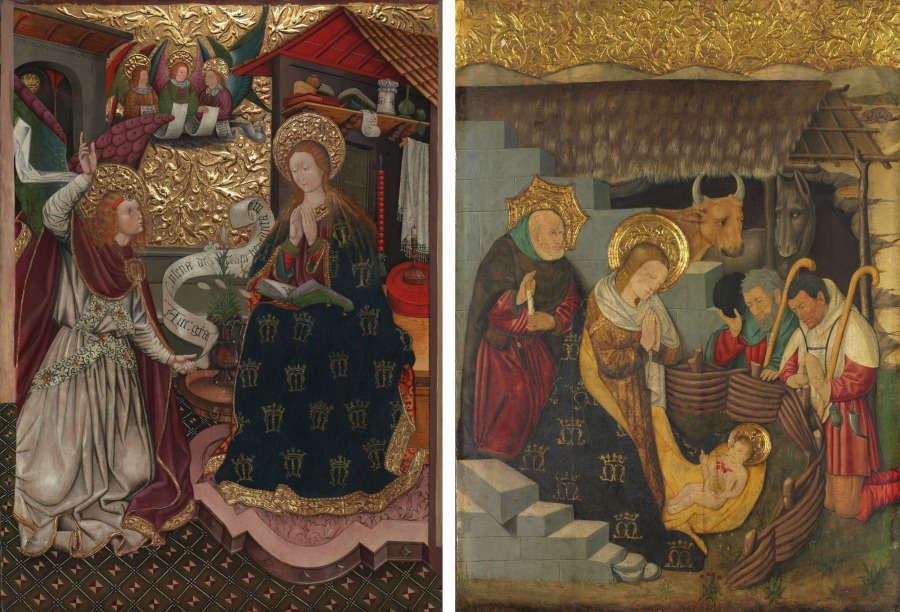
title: The Annunciation and The Nativity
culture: Spain, Catalonia, 15th century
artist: Jaume Ferrer the Younger (Spanish, Catalonia died c. 1460/70)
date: c. 1457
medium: oil, tempera, and gold on wood panel (fir)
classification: Painting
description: These paintings are believed to be the remaining components of a six-panel altarpiece. The large central panel is now preserved in Barcelona (Museu National d’Art de Catalunya). Ferrer collaborated with the painter Pere Garcia de Benavarri on this commission. Spanish works like these often feature elaborate treatment of the gold background, evident here in the exuberant raised decoration (called pastiglia) in the skies and the haloes, as well as other details. Here the Archangel Gabriel proclaims the Virgin’s destiny as the mother of Christ. The setting is an ordinary house, but simple objects have symbolic meaning. The lilies represent the Virgin’s purity; the covered jar and water carafe symbolize inviolability; the pomegranate symbolizes Christ’s resurrection, while the apple alludes to humankind’s fall from grace. The two books, closed and open, refer respectively to the Old and New Testaments: one foretelling and the other fulfilling the promise of the messiah. Both The Annunciation and The Nativity were components of a large altarpiece probably dedicated to the Virgin. Spanish works like these often feature elaborate treatment of the gold background, evident here in the exuberant raised decoration (called pastiglia) in the skies and haloes, as well as other details such as the vase of lilies in the Annunciation. The Annunciation The archangel Gabriel, gesturing toward God in a window above, proclaims the Virgin's destiny as the mother of Christ. Gabriel holds a scroll with the words from the New Testament (in Latin) "Hail Mary, full of grace, the Lord is with you." The angels in the sky hold another scroll proclaiming: "Glory to God in the highest, and peace to good people on earth". The simple objects surrounding the Virgin appear to be the furnishings of an ordinary house, but they carry symbolic meaning. The lilies represent the Virgin's purity; the covered jar and the water carafe symbolize inviolability. The towel and basin hint at ritual cleansing during Mass. The blown out candle points to the arrival of divine light in the world. The pomegranate symbolizes Christ's resurrection, while the apple alludes to humankind's fall from grace. The two books, closed and open, refer respectively to the Old and New testaments: one foretelling and the other fulfilling the promise of the Messiah.